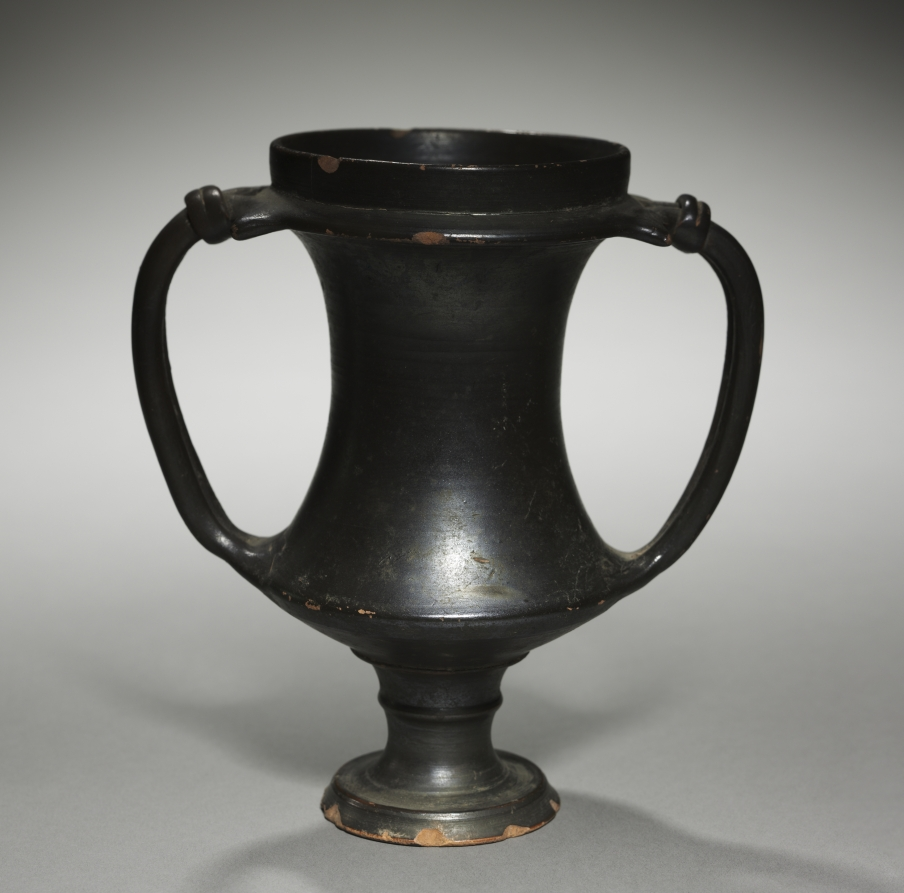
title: Black-Gloss Kantharos or Karchesion (Drinking Cup)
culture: Etruscan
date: 400–200 BCE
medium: ceramic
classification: Ceramic